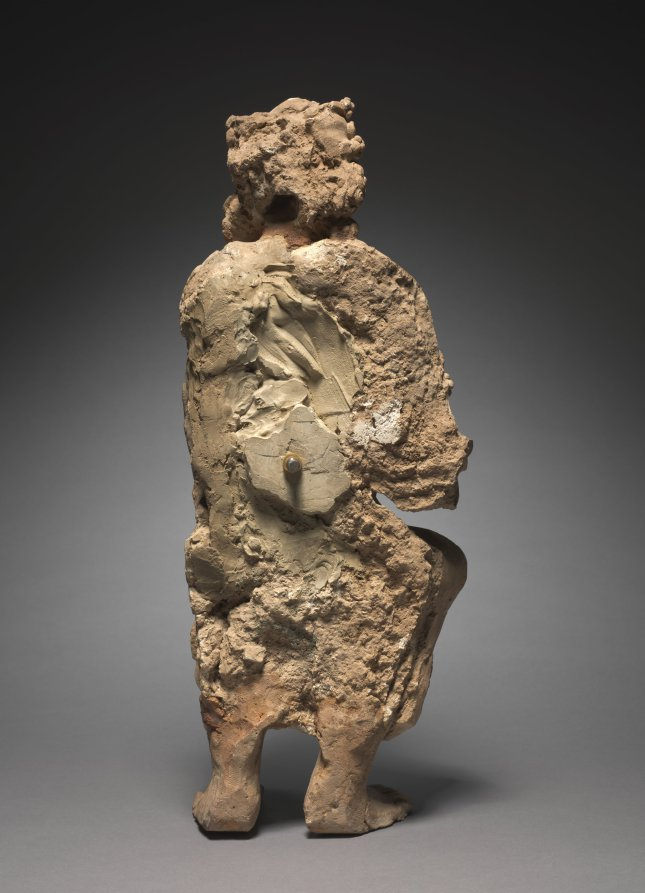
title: Adoring Attendant from a Buddhist Shrine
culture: Afghanistan, Gandhara, Kushan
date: c. 300s–400s CE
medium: stucco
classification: Sculpture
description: The medium of stucco became popular after the 4th century for works made for Buddhist sanctuaries, especially in the desert regions of Afghanistan where stone was less available. The more malleable material allowed sculptors to create sensitive and supplely modeled forms. The stucco sculptures were covered with a thin coat of lime-based whitewash, then painted; traces of original red pigment remain in some areas.